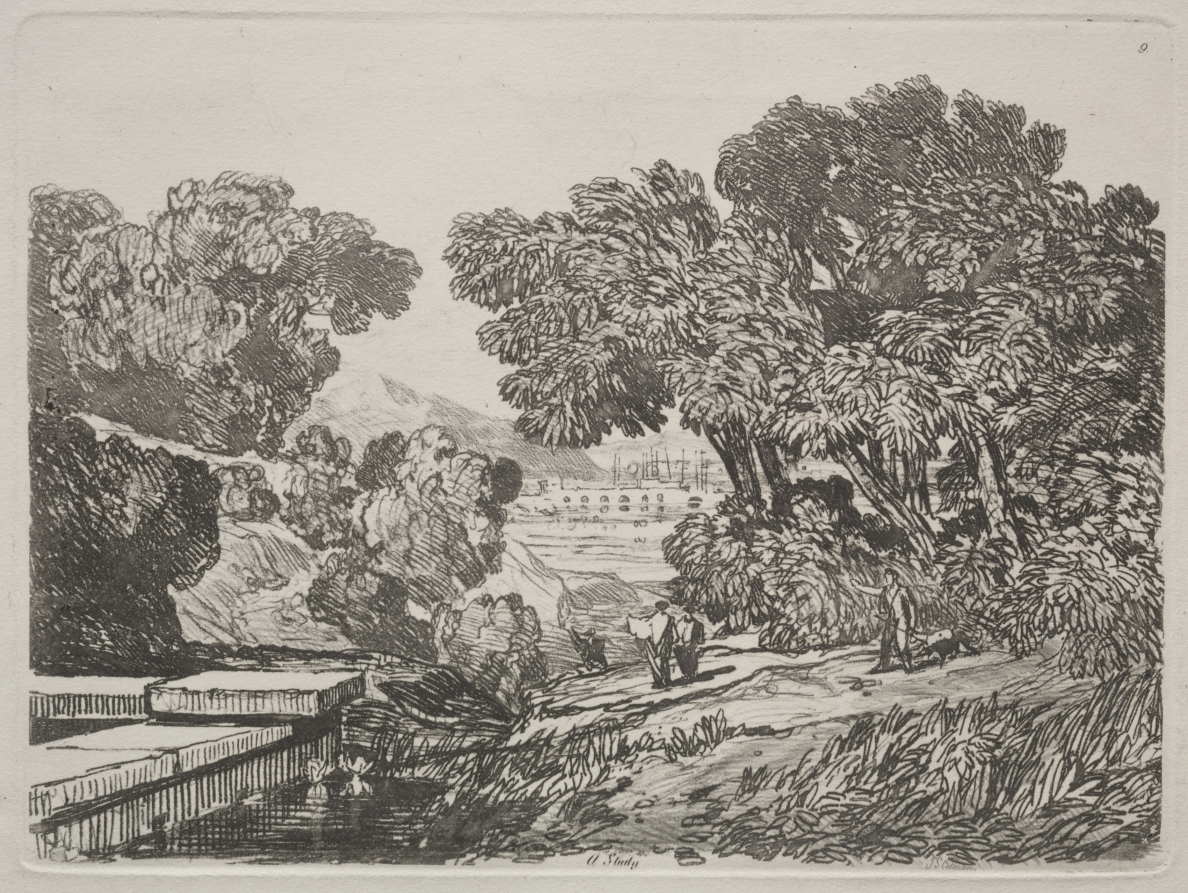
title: Liber Studiorum: A Study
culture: England, 19th century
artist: John Sell Cotman (British, 1782–1842)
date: 1838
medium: etching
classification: Print